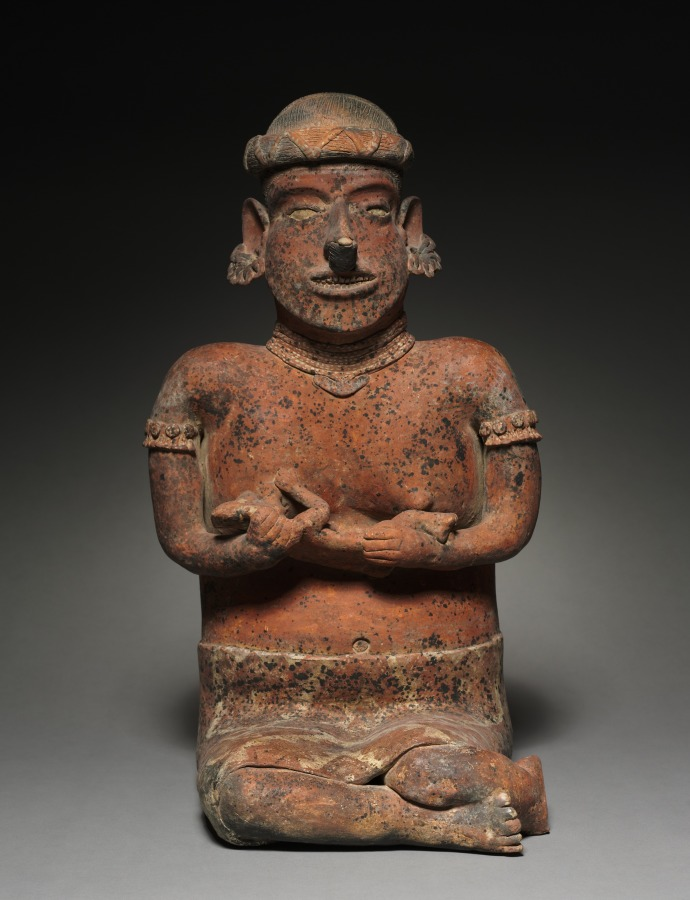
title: Pair of Seated Figures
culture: Mexico, Nayarit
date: 100 BCE–300 CE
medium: ceramic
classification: Ceramic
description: This couple-extremely fine examples of their kind-may commemorate the marriage of an important person, such as a chief, but could also represent siblings of a chiefly family. Whatever their relationship, their unity is conveyed by their physical similarities, including their jewelry, which marks high social station. The female is unusual in nursing an infant, likely a reference to generational renewal and the continuation of noble bloodlines. The significance of the male’s activity-beating a turtle-shell drum- is not understood.